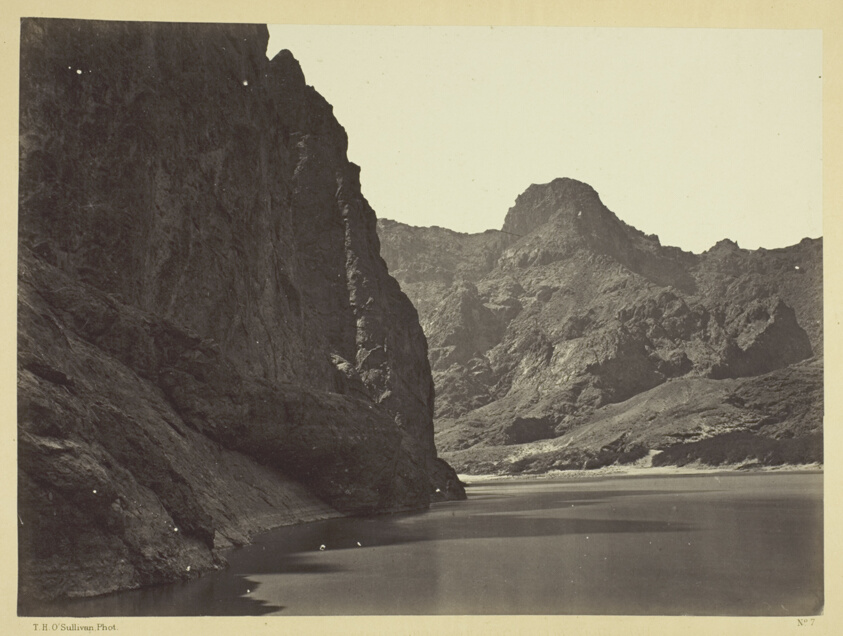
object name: Photograph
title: Black Cañon, Colorado River, looking below near Camp 7. Explorations in Nevada and Arizona, Expedition of 1871. Lieut. Geo. M. Wheeler, Com'd'g.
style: 19th century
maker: Timothy O'Sullivan (American, born Ireland, 1840–1882)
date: 1871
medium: Albumen print, from the album "Geographical & Geological Explorations & Surveys West of the 100th Meridian," vol. 1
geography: United States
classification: albumen silver print; photographic process; photography; photograph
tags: Collected by Hugh Edwards